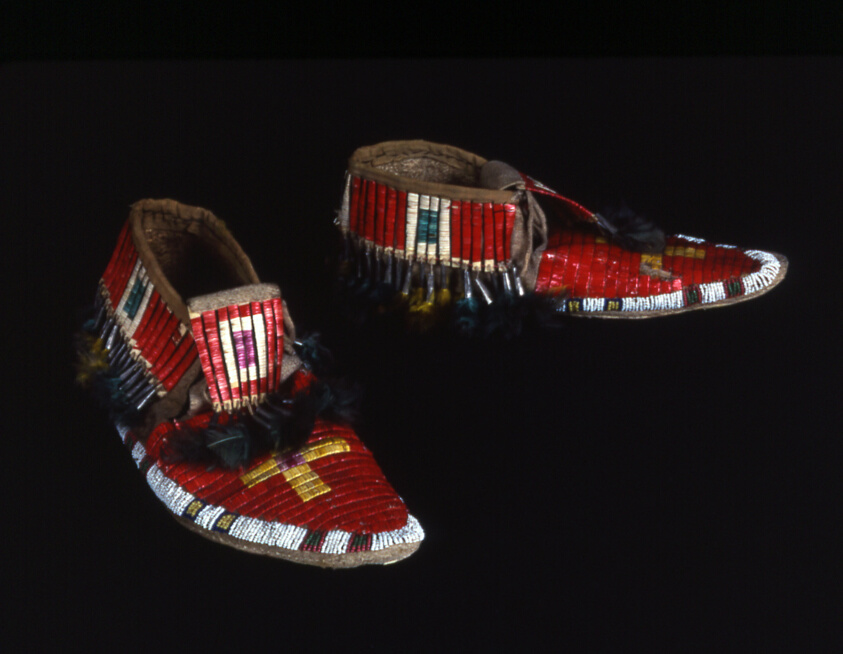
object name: Textile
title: Pair of Moccasins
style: santee, sioux, plains indian, native american, americas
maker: Santee Sioux; Plains, North America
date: 1875/1900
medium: Hide, stitched with animal product; embroidered with porcupine-quill-wrapped cotton in buttonhole stitches; beaded with glass beads; tassels of cotton, metal, and feathers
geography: Plains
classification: textile; shoes - needlework; costume accessory - shoe; costume accessory; costume; dress (garment); clothing